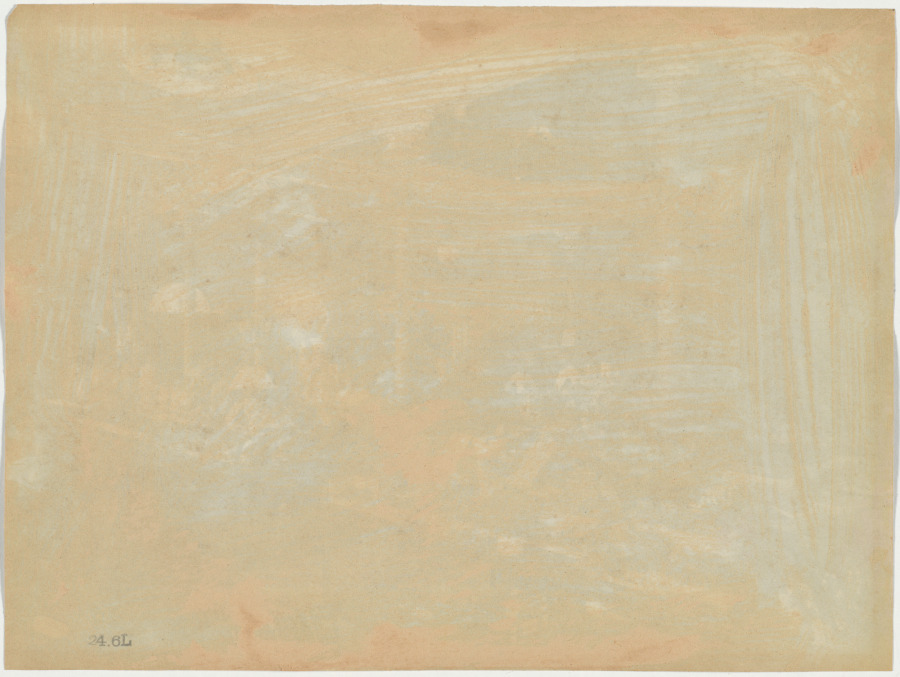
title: Treacher and Co.'s Shop in the Fort, Bombay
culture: India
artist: Raja Deen Dayal (Indian, 1844–1905)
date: 1886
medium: albumen print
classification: Photograph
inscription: Stamped in black ink on verso: “8.7B”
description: The English in India approximated life back home instead of adopting local ways. This image, probably one of Deen Dayal’s stock photographs, proved to those back in England that the comforts of home were readily available in India. Treacher’s, a multistory emporium in Bombay, offered a plethora of products ranging from drugs, wine, and electromedical instruments to silver tea sets and rocking horses. Many goods were imported, but some local craftsmen had mastered traditional European forms for objects including furniture and silver.